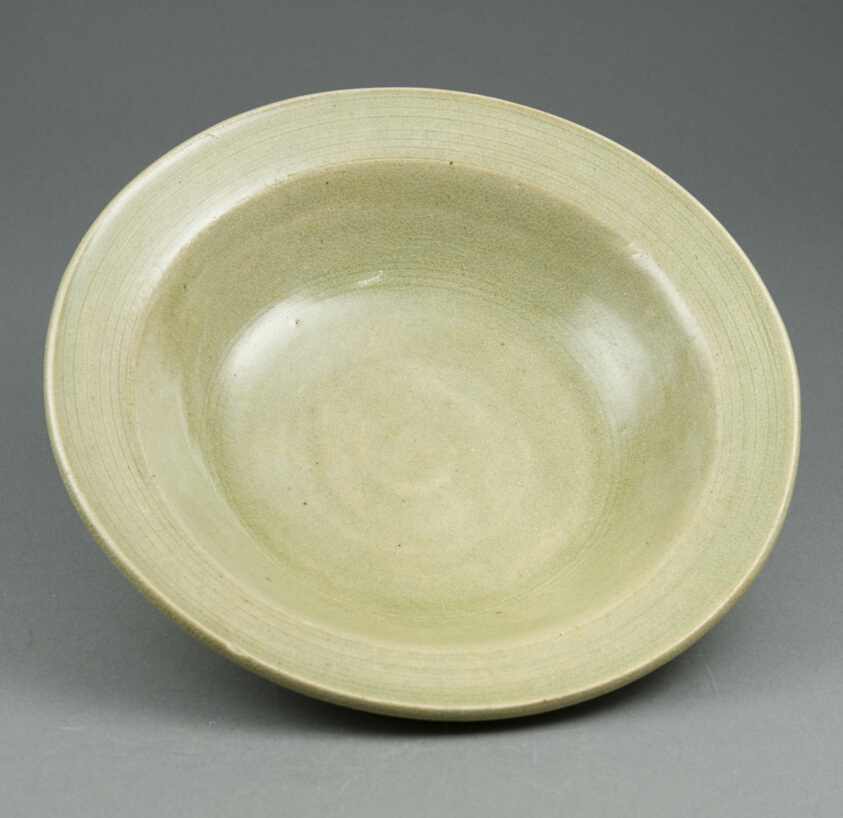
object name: Decorative Arts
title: Dish with Incised Rings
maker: Thailand, Chiang Rai Province, Muang Phan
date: 14th century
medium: Stoneware with celadon glaze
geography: Northern region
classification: stoneware; decorative arts